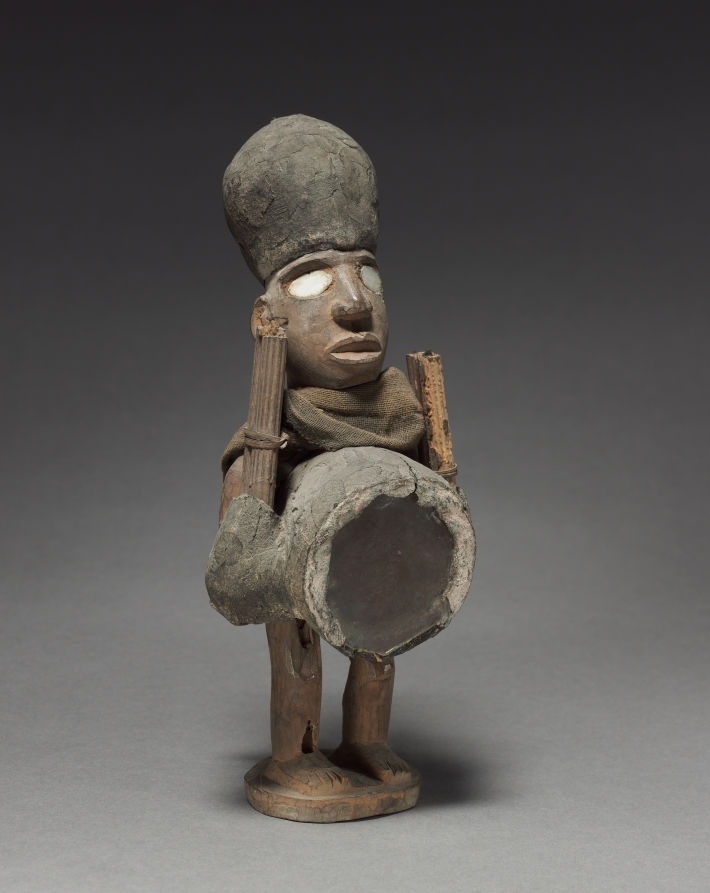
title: Power figure (nkisi)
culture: Africa, Central Africa, Republic of the Congo, Kongo-style maker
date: late 1800s–early 1900s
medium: Wood, organic materials (including resin), cloth, metalized glass, possibly porcelain, and plant fiber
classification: Sculpture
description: This figure is one of the two tallest of the seven anthropomorphic minkisi figurines previously in the Delenne collection. Identified as an nduda, two upward “guns” are attached on its side loaded with gunpowder used to shoot witches. Its label bears the word colique, a term referring to heavy pains caused by intestinal obstruction.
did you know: The object’s two small guns are pointing upward, but bears the label “colique,” a term referring to heavy pains caused by intestinal obstruction.